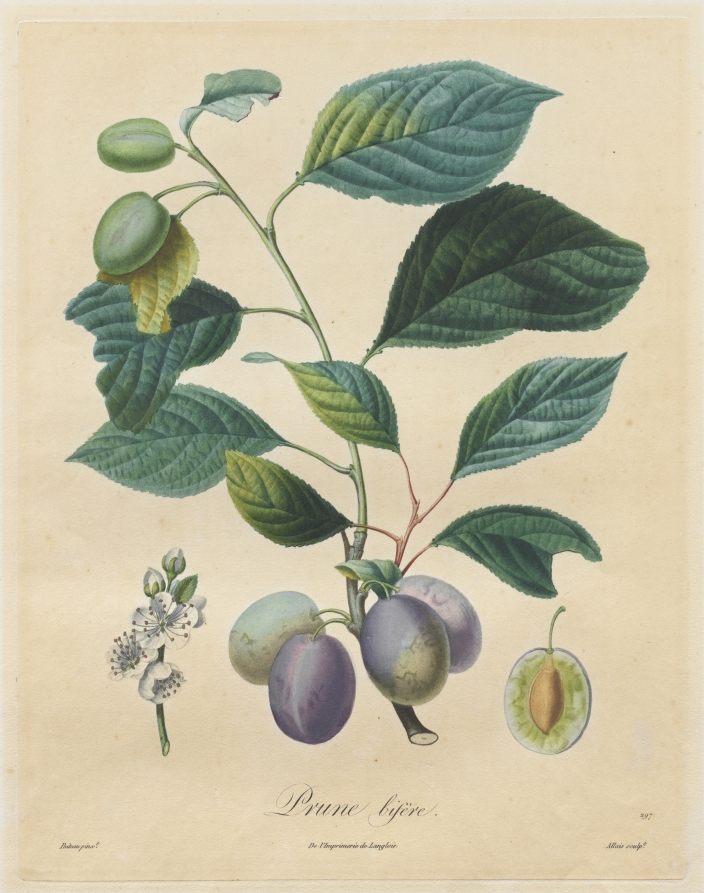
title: Traité des arbres fruitiers: Prune bifère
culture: France, 19th century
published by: Henri Louis Duhamel du Monceau (French, 1700–1782)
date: 1808–1835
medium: stipple and line engraving, with hand coloring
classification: Print